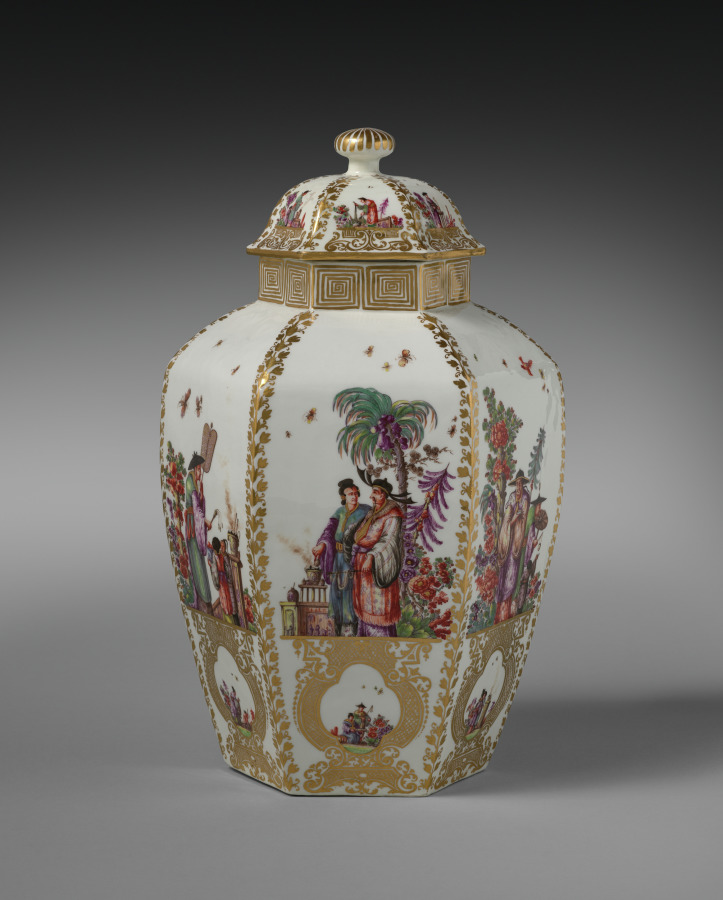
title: Covered Vase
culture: Germany, Meissen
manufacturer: Meissen Porcelain Factory (German, est. c. 1710)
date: c. 1728–30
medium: porcelain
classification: Ceramic